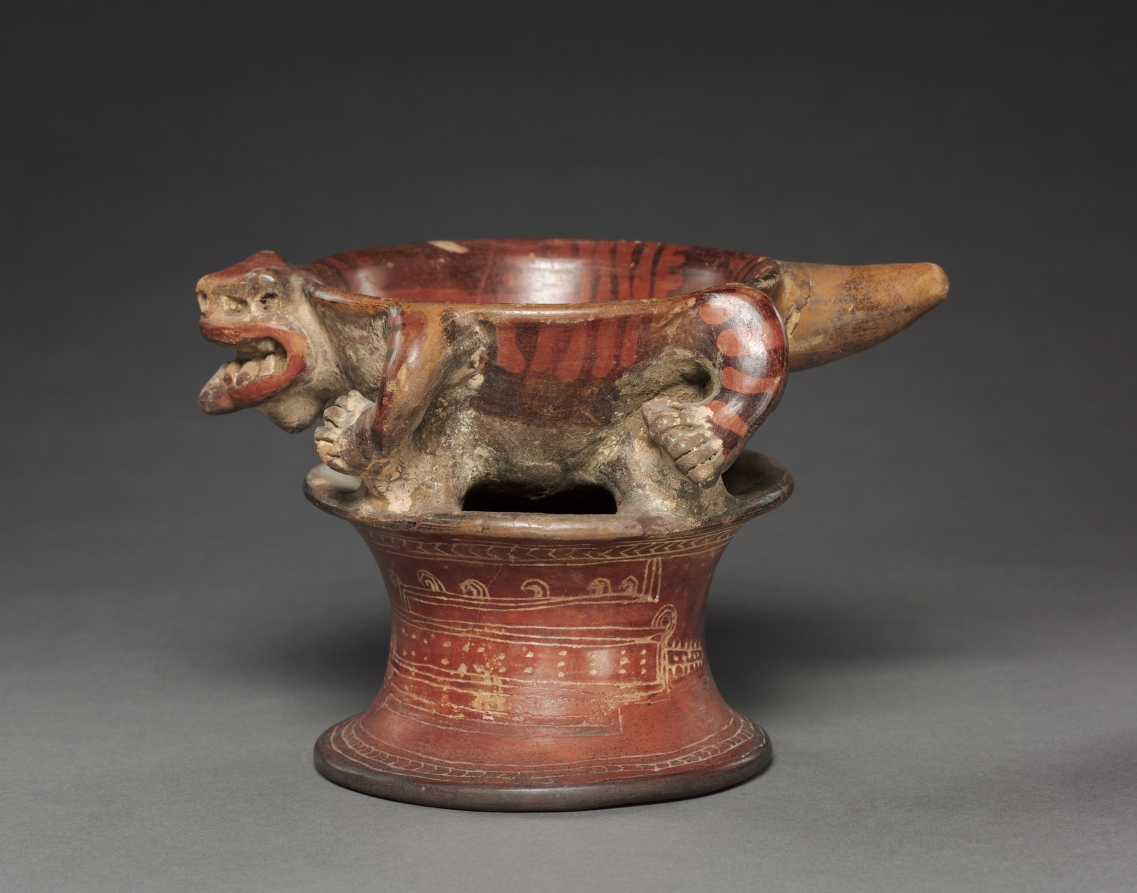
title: Jaguar Bowl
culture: Colombia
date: c. 850–1500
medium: resist-painted earthenware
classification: Ceramic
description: Probably from the southern highland region of Colombia, this unusual vessel has a bowl in the form of a comically fierce jaguar, mounted atop a pedestal base.